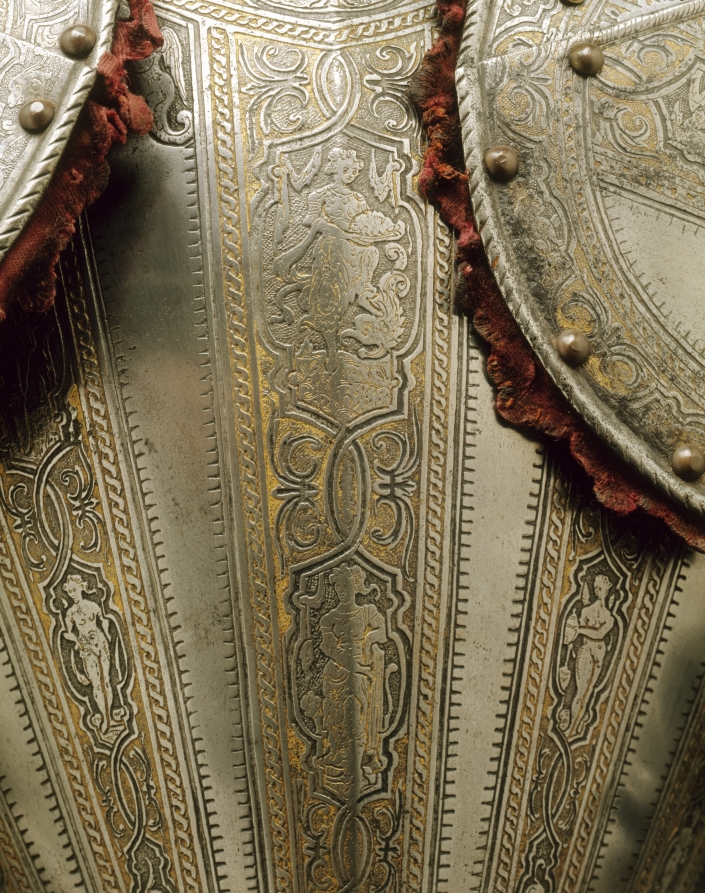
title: Half Armor for the Foot Tournament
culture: Italy, Milan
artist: Pompeo della Cesa (Italian, active 1572–93)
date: c. 1590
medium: etched and gilded steel, brass rivets, leather and velvet fittings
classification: Arms and Armor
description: This armor was designed for the foot tournament, an event that was separate from the equestrian jousts popularized during the Middle Ages and still favored among Renaissance aristocracies throughout Europe. Foot tournaments were commonly fought over a barrier that separated the combatants and gave protection to their legs, so a half-armor such as this one provided sufficient protection. The original owner of this suit would have worn it with colorful puffed and slashed britches and hose. The use of outlandish accessories, such as a large ostrich feather plume (a brass plume holder may be seen on the back of the helmet) and red velvet pickadils between the steel plates, provided additional splendor.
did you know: Pompeo della Cesa was the Armani or Gucci of the 1500s; everyone wanted to wear him.